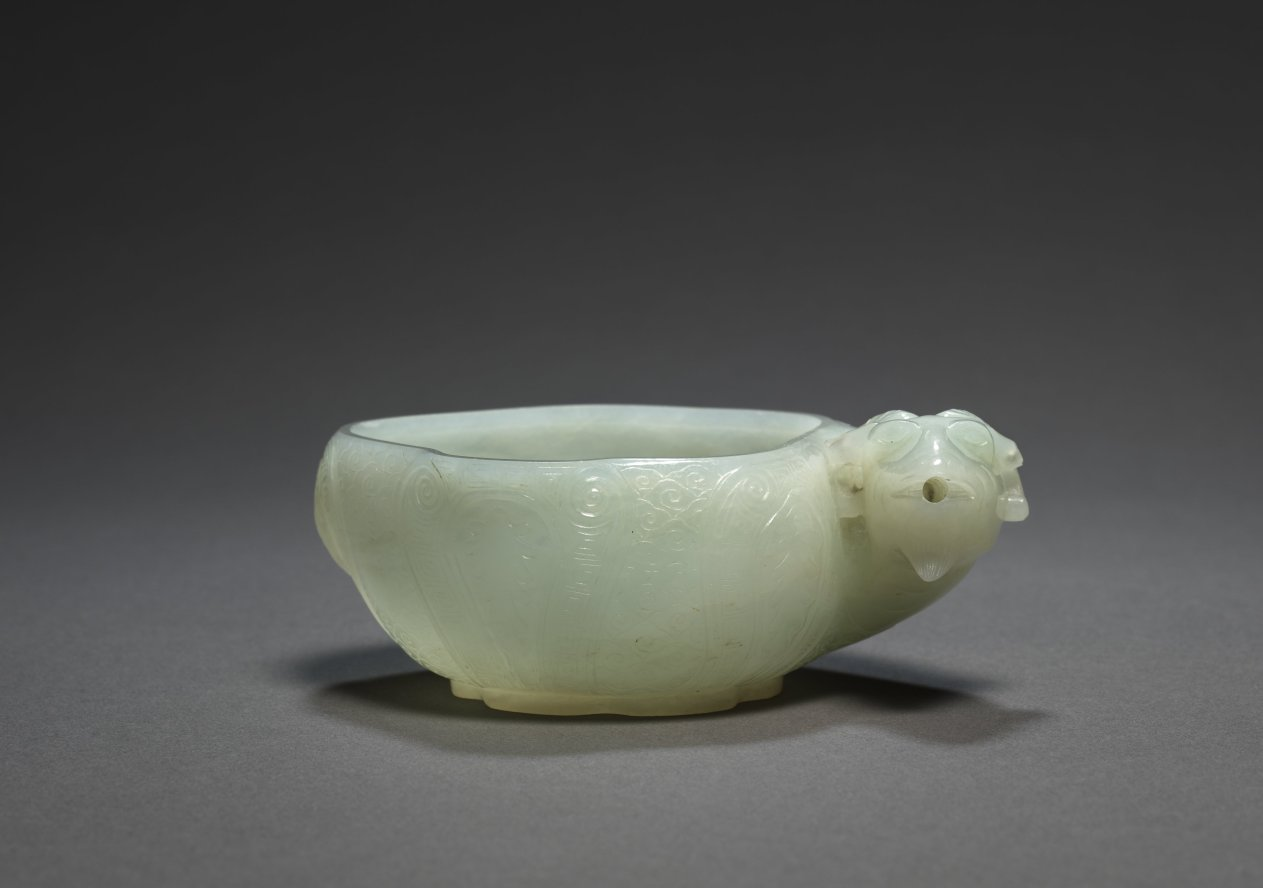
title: Waterpot with Ram's Head Spout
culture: China, Qing dynasty (1644–1911)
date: 1700s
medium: white jade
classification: Jade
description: Pure white jade like this, known to the Chinese as "mutton-fat" jade, is particularly prized. The white color has been the preferred shade of jade throughout the ages. The radiance and purity are linked metaphorically to the virtues of the ideal Confucian scholar. The translucent quality of the jade has moral and poetic allusions attached to it.